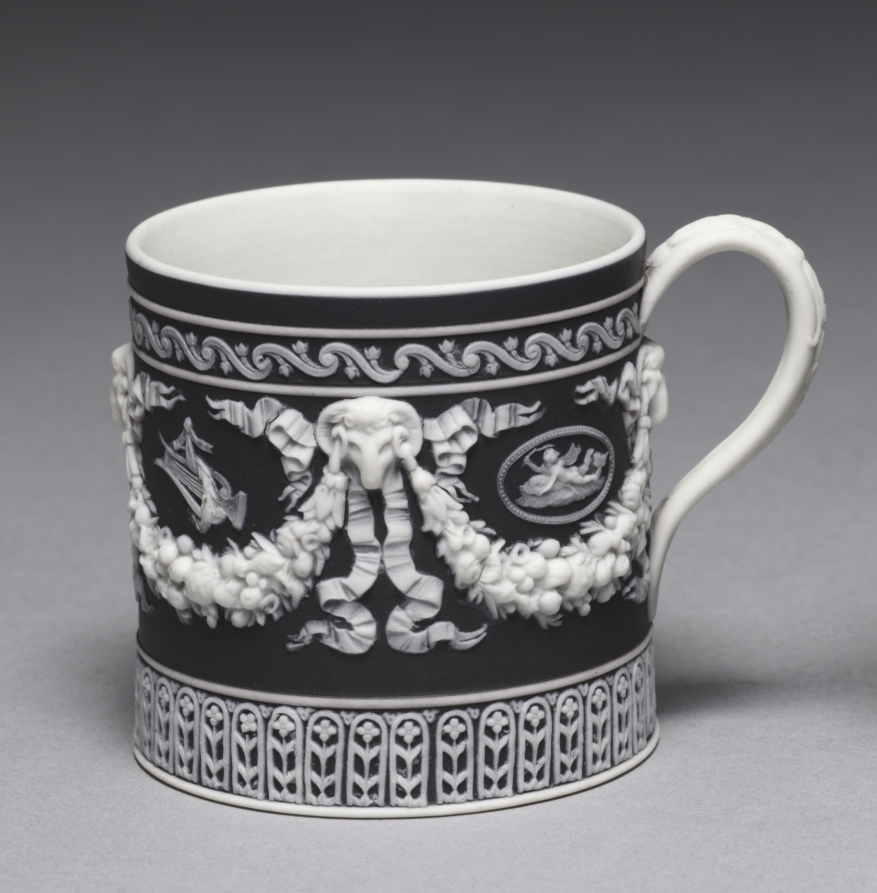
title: Cup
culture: England, Staffordshire, 18th century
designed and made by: Wedgwood Factory (British)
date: c. 1790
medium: jasper ware with relief decoration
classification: Ceramic